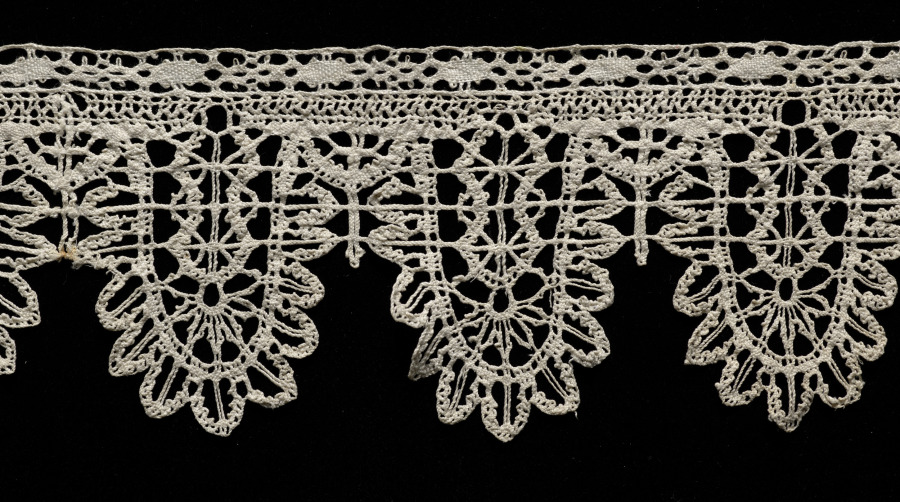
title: Lace Edging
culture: Italy, Genoa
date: 1600s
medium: Bobbin lace (rose lace)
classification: Lace